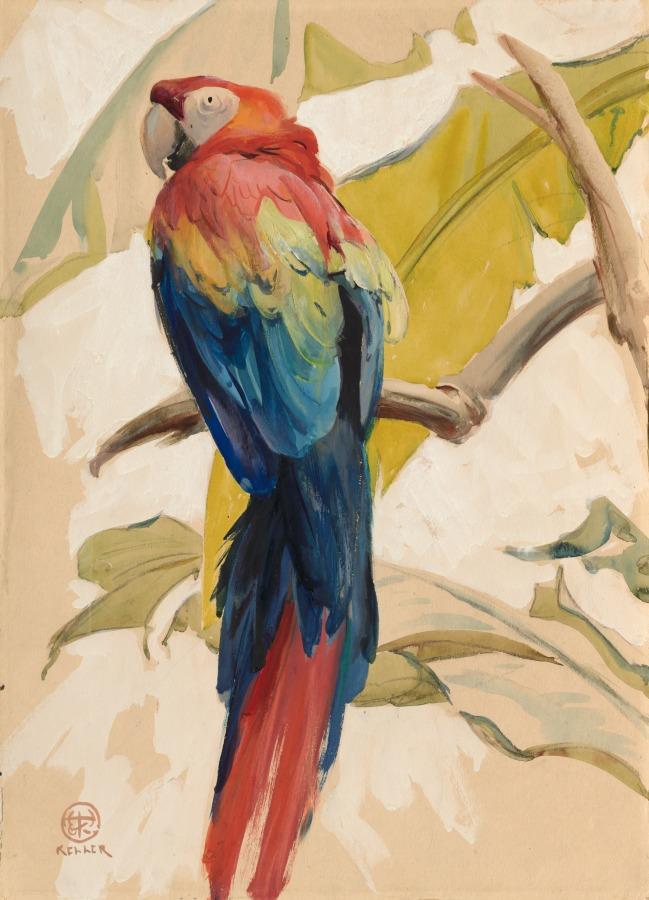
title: Old Grumpy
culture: America, Ohio, Cleveland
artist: Henry Keller (American, born Germany, 1869–1949)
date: 1926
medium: watercolor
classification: Drawing